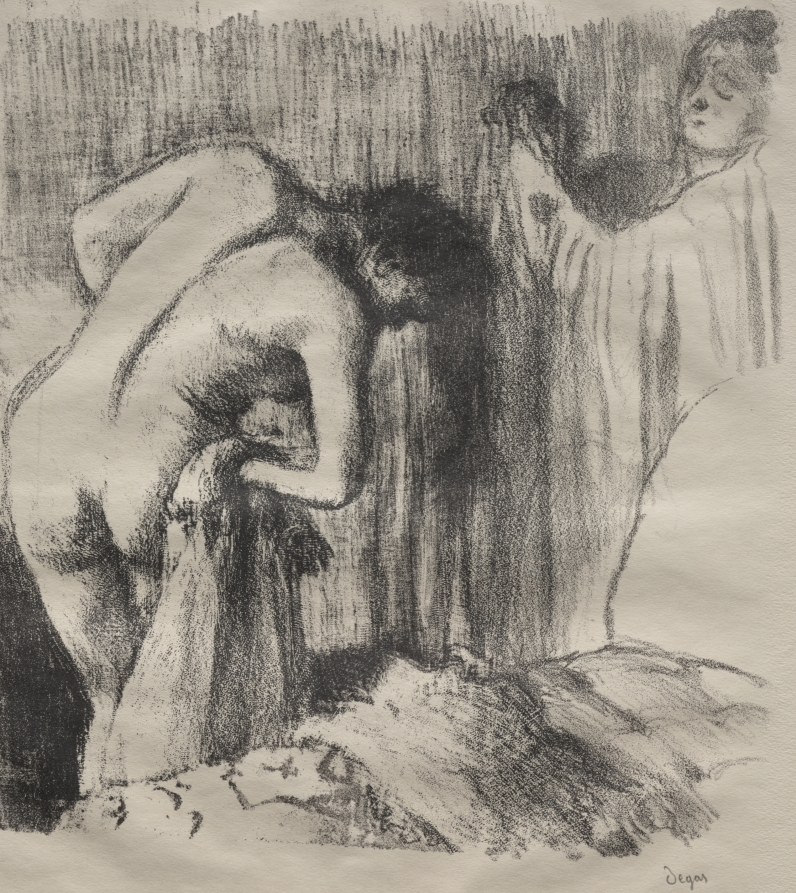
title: After the Bath III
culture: France, 19th century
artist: Edgar Degas (French, 1834–1917)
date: 1891–92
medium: lithograph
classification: Print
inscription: signed, lower right: "Degas" in pencil